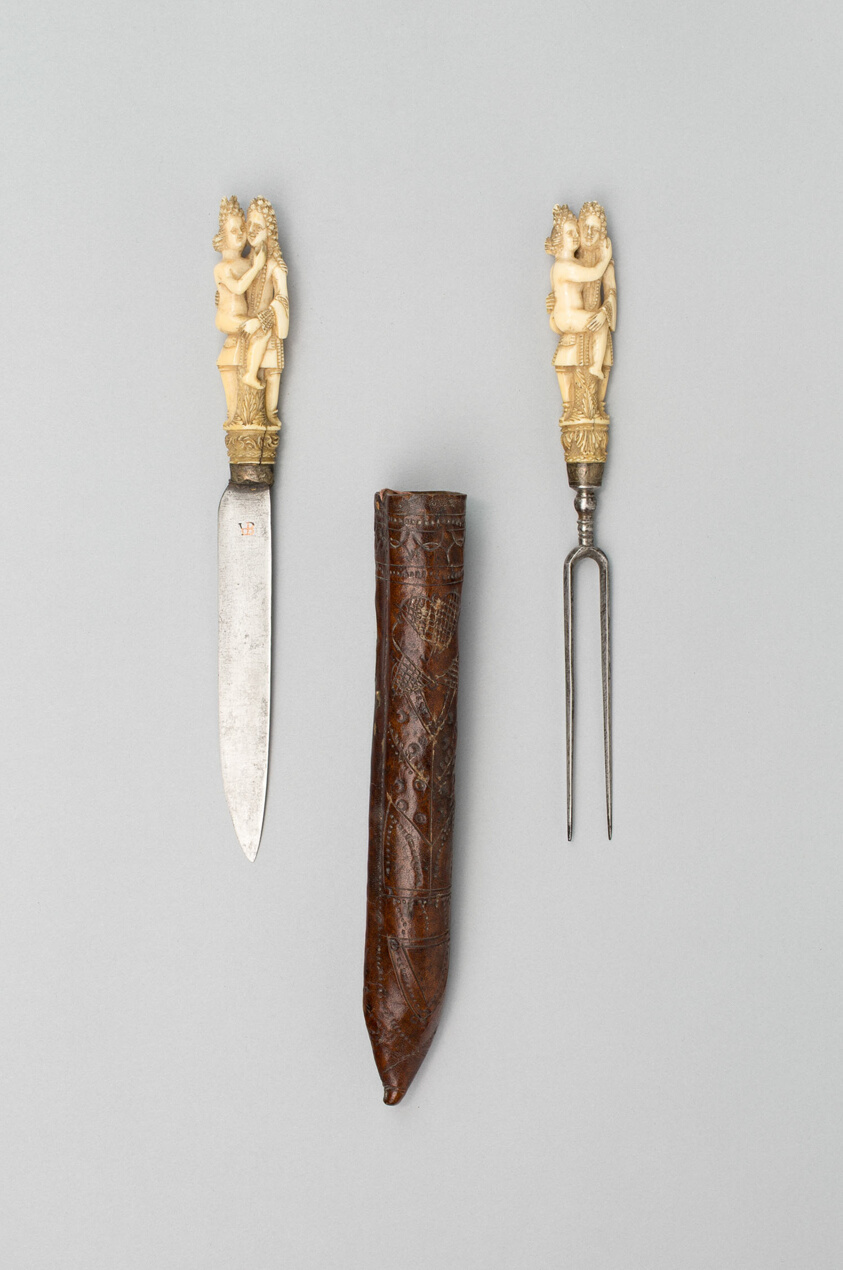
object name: Metalwork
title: Fork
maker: European, possibly Dutch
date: late 17th century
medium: Steel, copper, and ivory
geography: Europe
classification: cutlery; arms and armor, miscellaneous; arms and armor; arms